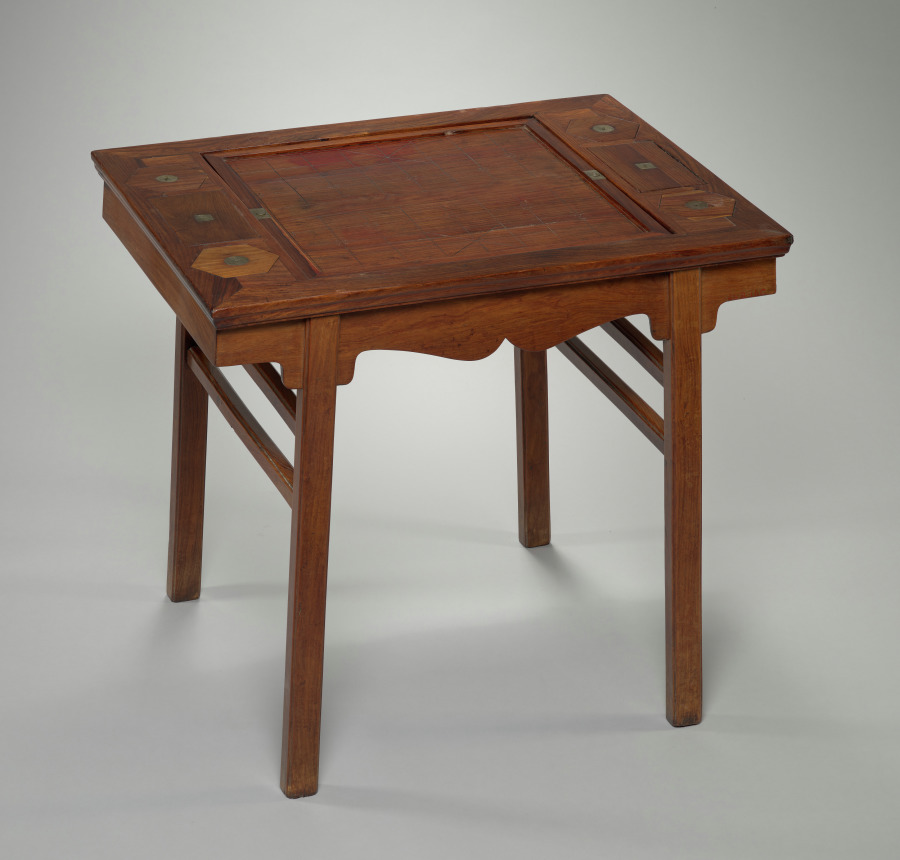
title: Game Table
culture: China, Ming dynasty (1368-1644) - Qing dynasty (1644-1911)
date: 1600s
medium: Rosewood (huanghuali)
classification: Furniture and woodwork